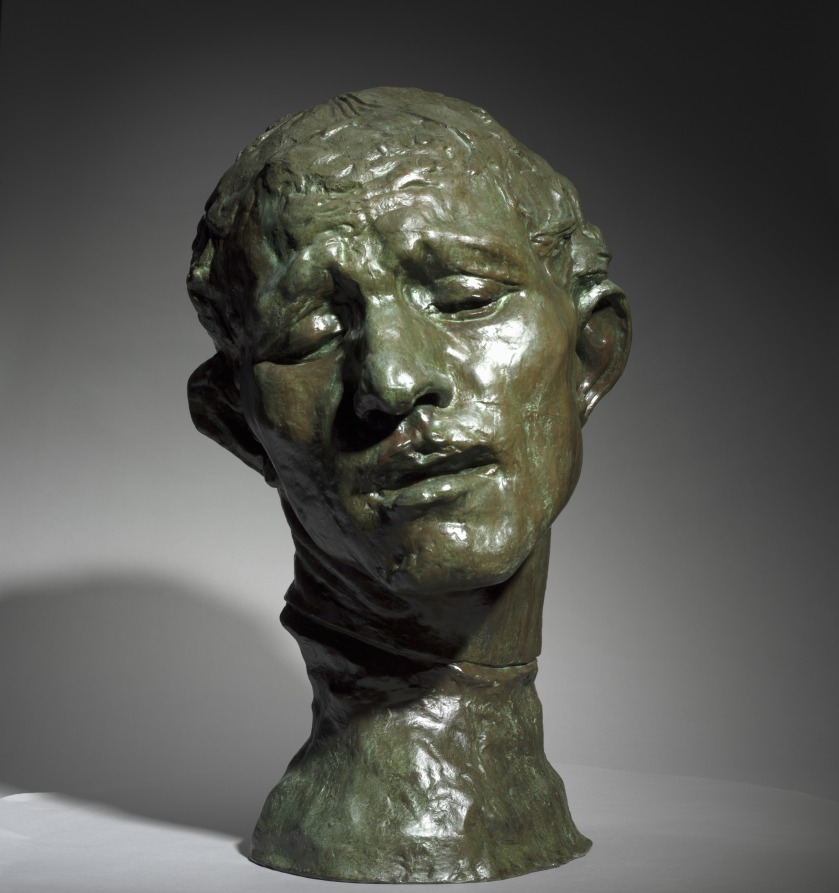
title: Heroic Head of Pierre de Wissant, One of the Burghers of Calais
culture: France, 19th century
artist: Auguste Rodin (French, 1840–1917)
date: 1886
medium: bronze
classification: Sculpture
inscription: inscribed at neck, left: A.Rodin; inscribed lower back: Alexis Rudier/Fondeur-Paris.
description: This sculpture depicts one of the figures in Rodin’s large public monument The Burghers of Calais (1884–89), featuring six French men who volunteered to be taken prisoner by the English in exchange for lifting the siege of Calais during the Hundred Years War (1337–1453). Pierre de Wissant’s anguished expression suggests extreme mental suffering as he contemplates his expected execution. Rodin exhibited a life-size version of the figure as an independent work before completing the monument. He later made multiple versions in various sizes and media.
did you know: This sculpture depicts the head of a figure from Rodin's large public monument The Burghers of Calais (1884-89). The CMA also owns a plaster version of the head.